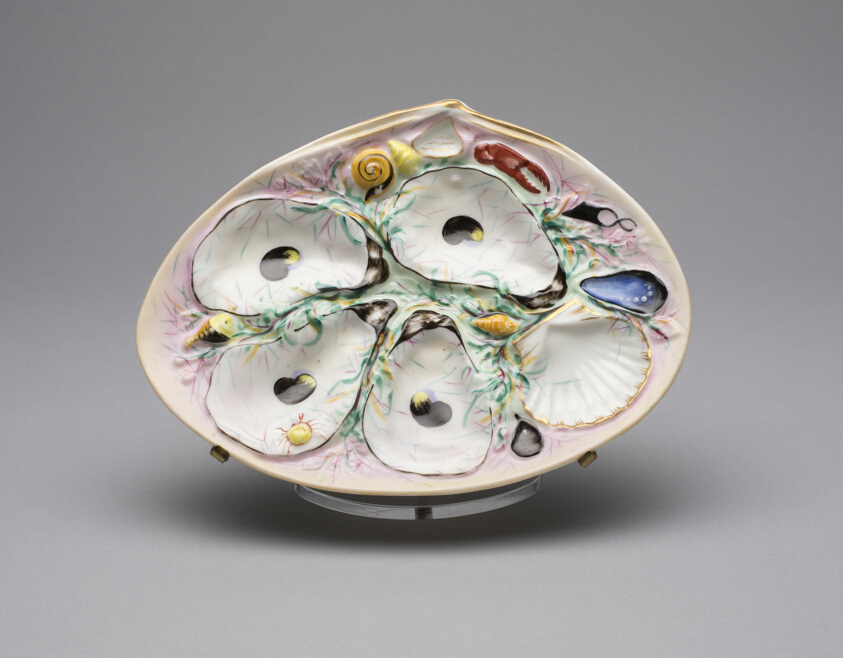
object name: Ceramics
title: Oyster Plate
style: Aesthetic Movement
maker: Union Porcelain Works (American, 1863–c. 1922); Greenpoint, Brooklyn, New York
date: Patented January 4, 1881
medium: Porcelain and glaze with gilding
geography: New York City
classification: plate (general, dish); porcelain; american decorative arts; art of the americas; pottery; ceramics; decorative arts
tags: oysters, shells, crustaceans, fish, dining, drinking